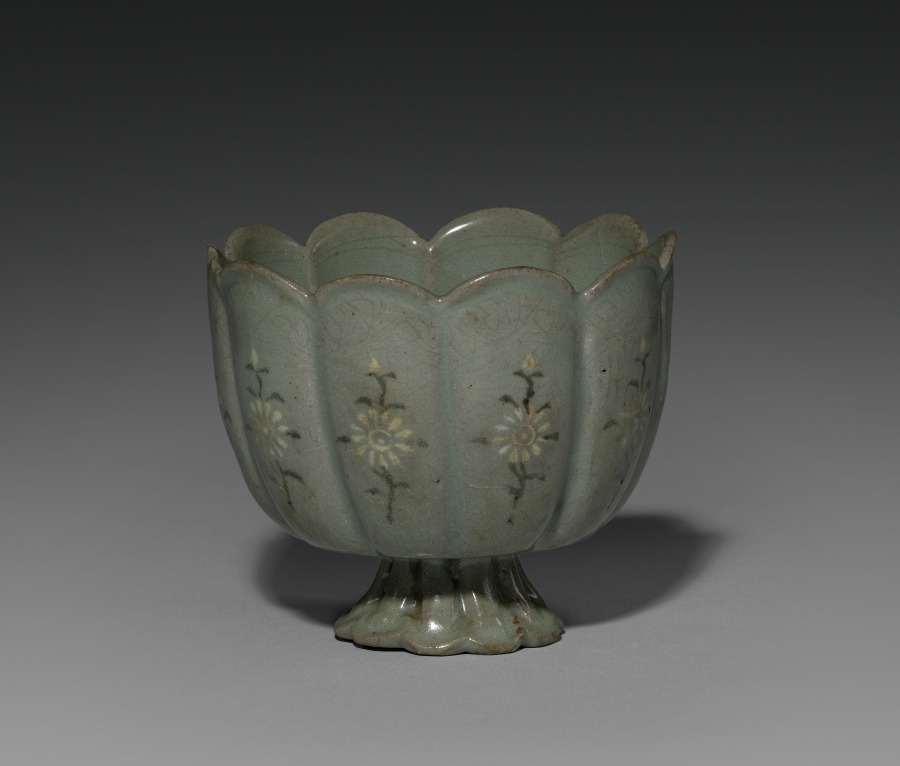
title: Cup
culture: Korea, Goryeo dynasty (918–1392)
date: 1100s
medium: Celadon ware with inlaid white and black slip decoration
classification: Ceramic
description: This celadon wine cup is inlaid with a chrysanthemum pattern that reflects Koreans’ enjoyment of both the poem "Drinking Wine" and the blessings of longevity associated with the Double Nine Festival. The flower design on the saucer is less delicate than the cup, as the cup and saucer were originally from different sets; they were later paired together after each lost its mate.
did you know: Elites of the Goryeo period are known for their love of drinking tea and wine. This type of delicate-looking cup stand not only made their drinking experience more enjoyable, but also showed their refined taste.